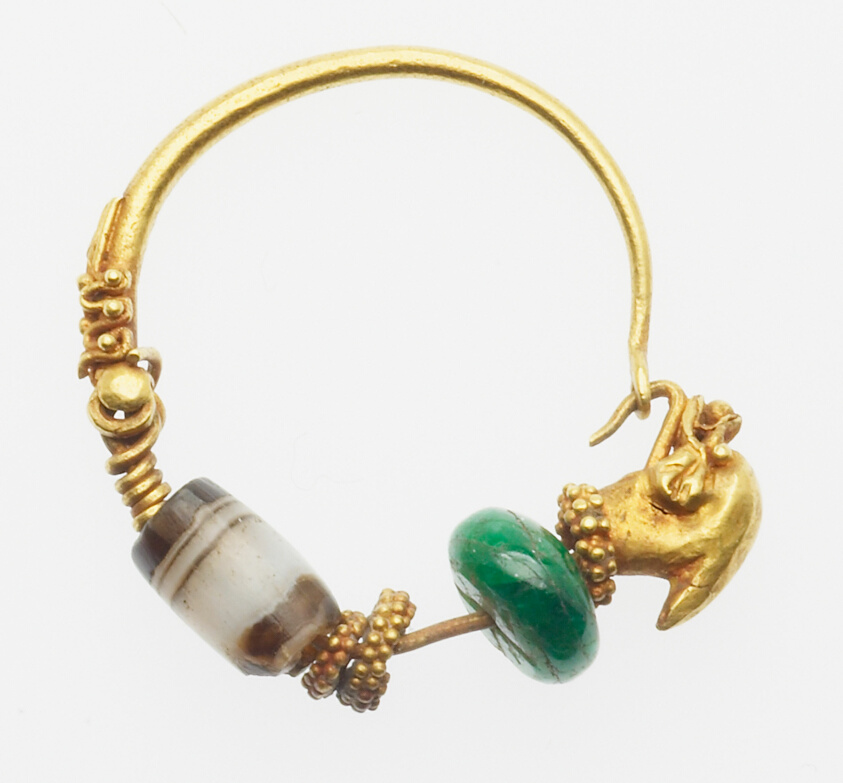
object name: Costume and Accessories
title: Earring with Dolphin Head Finial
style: hellenistic, greco-roman, greco-roman (egyptian)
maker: Greek, Hellenistic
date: 3rd-2nd century BCE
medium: Gold, glass, sardonyx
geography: Ancient Greece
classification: ear ornament; gold; metal; jewelry; ancient art; costume